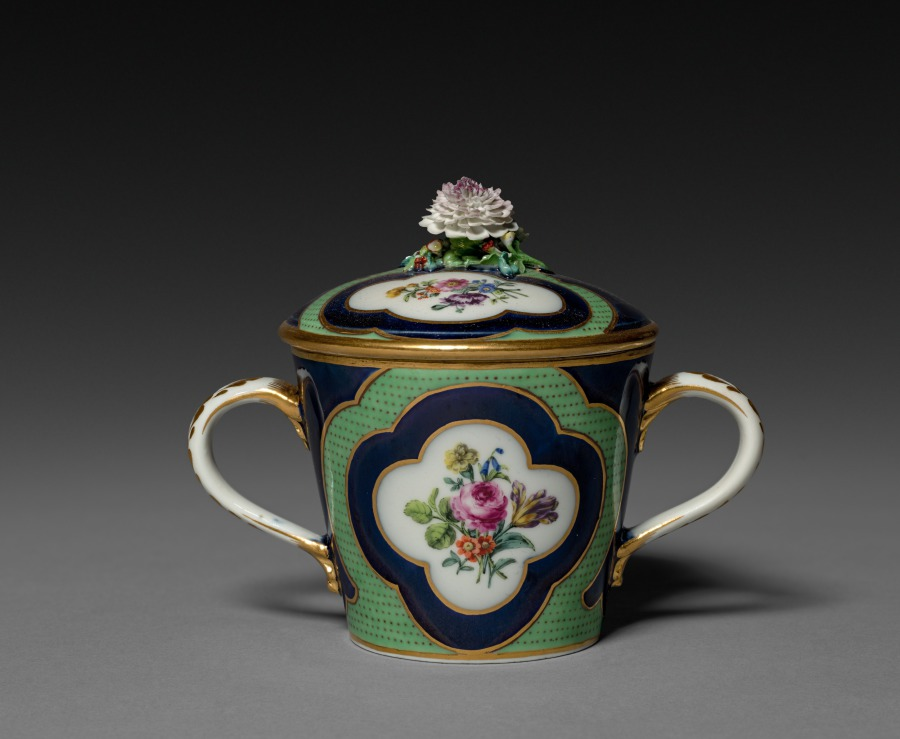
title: Cover for a Cup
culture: Austria, Vienna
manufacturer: Du Paquier Porcelain Manufactory (Austrian, active 1719–1864)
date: c. 1780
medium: porcelain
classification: Ceramic